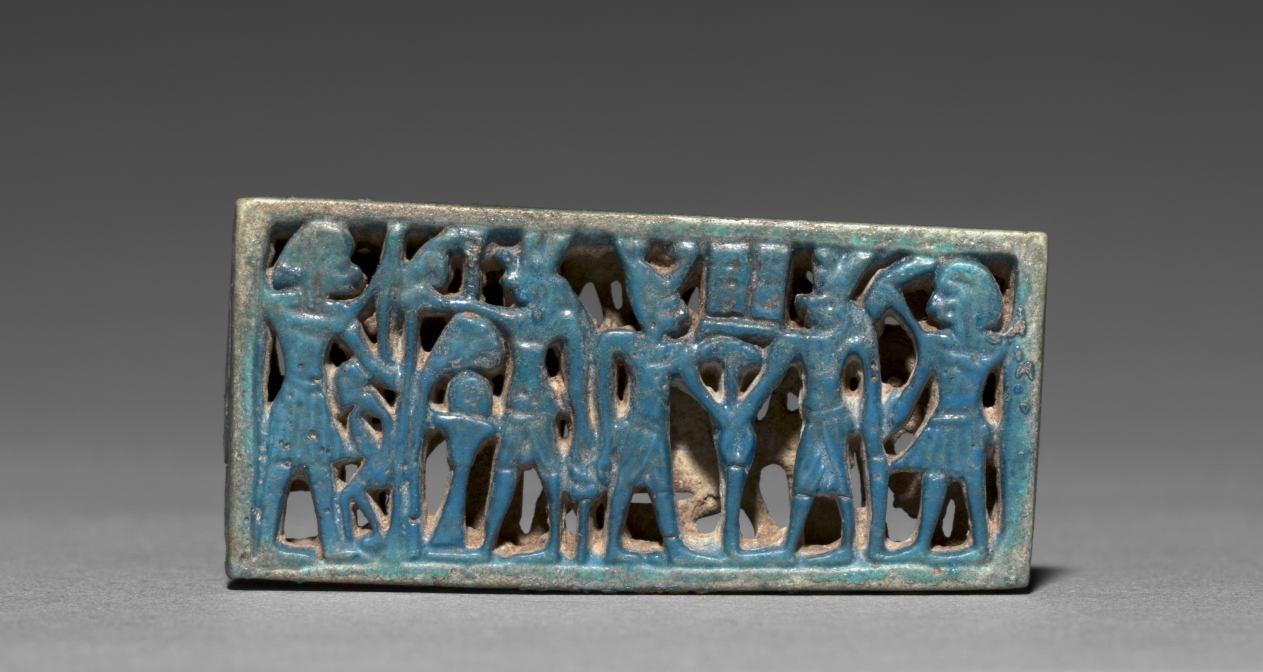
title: Openwork Spacer Bead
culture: Egypt, Third Intermediate (1069–715 BCE), Dynasties 21–22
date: 1069–715 BCE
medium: turquoise faience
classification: Jewelry